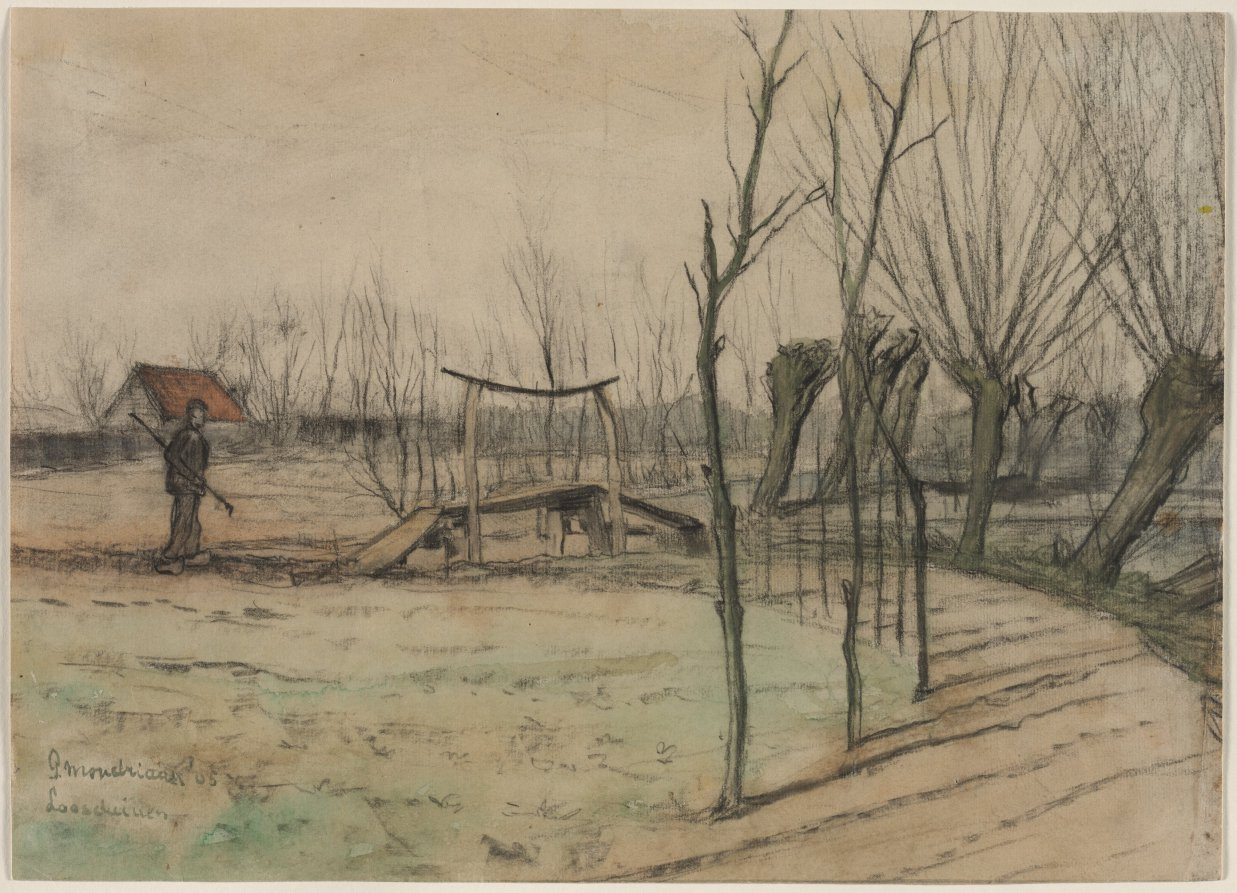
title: Landscape at Loosduinen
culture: Netherlands, early 20th Century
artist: Piet Mondrian (Dutch, 1872–1944)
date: 1905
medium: black chalk (extended with water in places), watercolor, and gouache; framing line in graphite (bottom edge)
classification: Drawing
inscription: signed, lower left, in watercolor: P. Mondriaan '05 / Loosduinen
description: Although Mondrian is best known for his De Stijl paintings and as a founder of modern, abstract art, he began as a landscape and figurative artist. Between 1897 and 1907, he executed about fifty landscapes each year, comprising nearly half of his entire oeuvre. In 1905, a large exhibition of Vincent van Gogh’s work was held at the Stedelijk Museum in Amsterdam. The spindly, bare trees, low horizon, and the lone peasant in Landscape at Loosduinen reveal the influence of the Dutch master upon Mondrian. The drawing’s degree of finish suggests that it was either done on commission or intended for exhibition and sale.